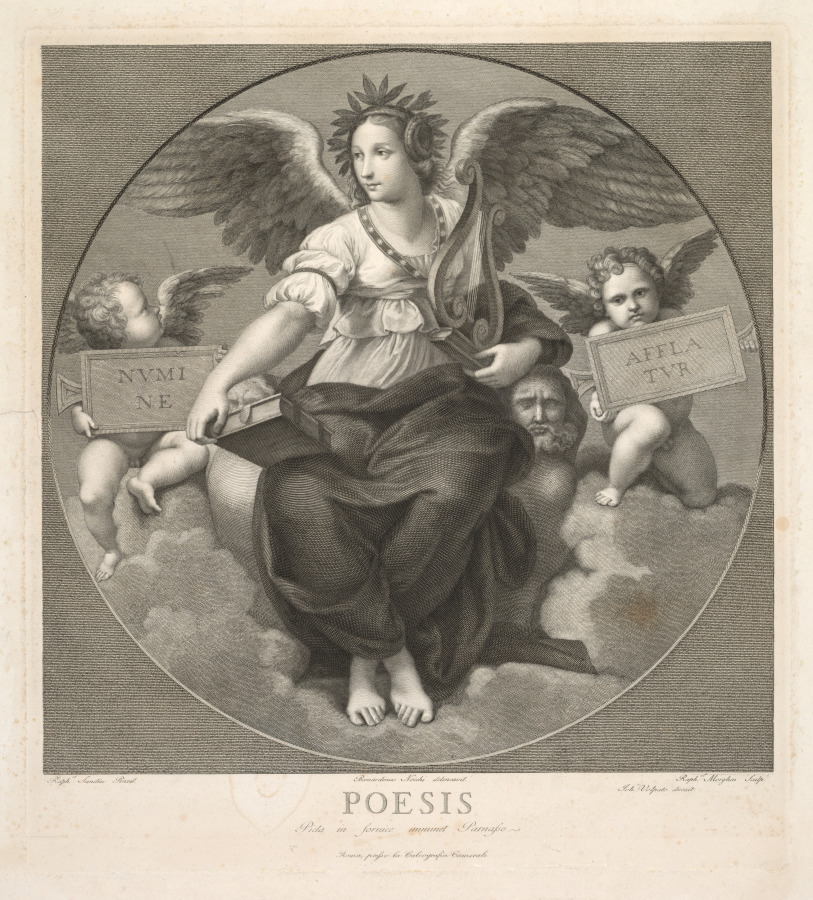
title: Poesis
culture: Italy, 18th-19th century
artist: Raffaello Morghen (Italian, 1761–1833)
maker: after Raphael (Italian, 1483–1520)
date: late 1700s–early 1800s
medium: engraving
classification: Print